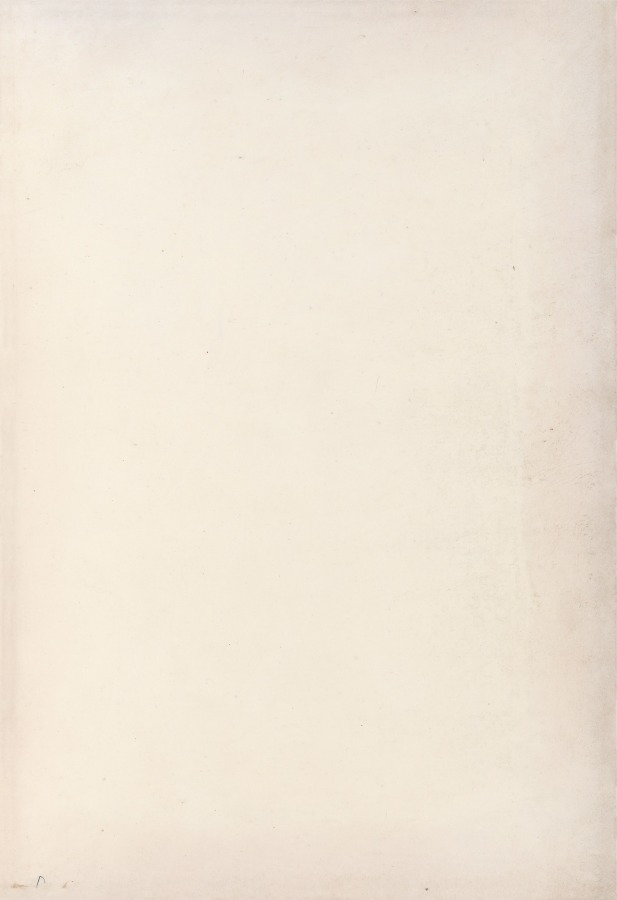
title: Hours of Queen Isabella the Catholic, Queen of Spain: Fol. 280v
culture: Flanders, Ghent and Bruges, late 15th century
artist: Master of the First Prayerbook of Maximillian (Flemish, c. 1444–1519)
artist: and Associates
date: c. 1500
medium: ink, tempera, and gold on vellum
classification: Bound Volume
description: This manuscript was illuminated by a circle of at least five highly organized manuscript painters active in the Flemish cities of Ghent and Bruges. The principal illuminator was Alexander Bening, who painted the majority of the book's miniatures. Manuscripts produced by this circle of artists are renowned for the decoration of their borders, which typically feature a rich variety of realistically-painted flowers, birds, and butterflies. This prayer book, called a book of hours, was intended not for a cleric, but for the private devotions of a lay person-in this case, Isabella the Catholic, Queen of Spain (1451-1504). Isabella's coat of arms embellishes the book's frontispiece. It is unlikely that the book was commissioned by the Queen herself; rather, she probably received it as a diplomatic gift from someone courting her patronage, perhaps Cardinal Francisco Jimenez de Cisneros. A Franciscan friar, Jimenez was dependent upon Isabella for his advancement, first to the post of Queen's confessor in 1492, and then to Archbishop of Toledo in 1495.